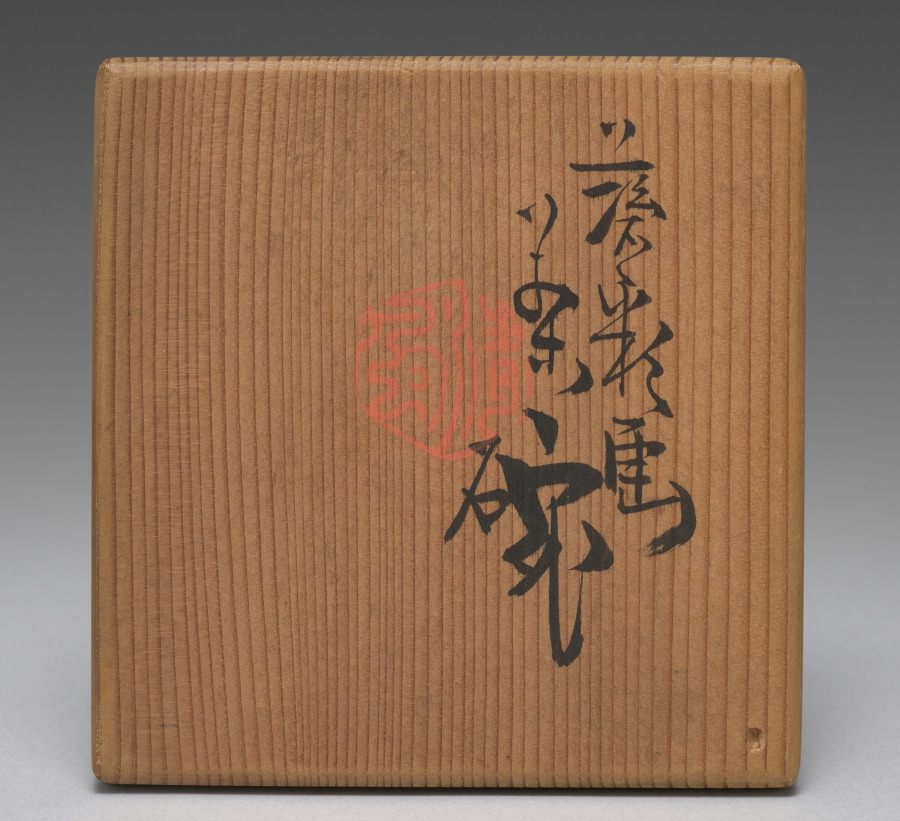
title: Teabowls with Peony and Crabapple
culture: Japan, Meiji period (1868–1912)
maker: Seifū Yohei III (Japanese, 1851–1914)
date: 1893–1914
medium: Set of five teabowls; porcelain with underglaze and overglaze color enamels and gold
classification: Ceramic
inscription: 清風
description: Overglaze color enamels are generally called iro-e (literally “color picture”) in the terminology customarily used for porcelain decoration of the Edo period. This set of teabowls is a fine example of Yohei III’s skilled use of the technique, which is identified on this set’s box lid with the alternate phrasing “porcelain with color painting” (jisaiga). Distinct from the way overglaze colors were used in Kakiemon ware from Arita, his designs and applications show a consciousness of porcelain decoration of the Qing dynasty. Here, he combines Chinese models with a sensibility taken from Kyoto ware precedents, including painting with powdered gold (kinrande). The colors used in the bowls are as follows: blue, black, gold, white, light green, green, and pink. The blue appears only inside the footring, as a double band of underglaze color. The black iron, used for stems and leaf veins, is painted over the glaze. The gold, also painted over the glaze, is used for leaves and the centers of flowers, for solid, glossy lines defining detail, or as a semimatte ground. The white of the peony flower is built up to a low relief over the glaze. Yohei has incised lines of varying widths into the pigment, carving away to the bowl’s surface, to differentiate individual petals and their rippled shapes. The light and dark greens, as well as the pink, are painted over the glaze. Of note is how Yohei has first used thinly applied lines of light green to draw the plum branch before applying the opaque iron black. For the plum buds and flowers, he has used a diluted pink with an opaque pink for outline, both over the glaze. In his later works, Yohei used pink both over and under the glaze in a manner similar to underglaze blue, and it can be challenging in some cases to discern which technique he has used. A lidded container in a private collection has a similar design but is augmented with the inclusion of white and purple magnolia blossoms. In contemplating the original decorative program of a set, of which these teabowls may have been a part, it is worth considering that perhaps not all objects included the full range of motifs. In such cases, the composition of the individual object may be best understood within the context of the extended ensemble. Here, the delicate pink plum on one side of the bowl seems slightly unbalanced with the bold white peony on the other, but when seen with other objects with the magnolia and its additional colors and shapes, it is possible to imagine a set with a complex, balanced design across multiple pieces.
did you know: These five teabowls were likely from a larger set of teaware.